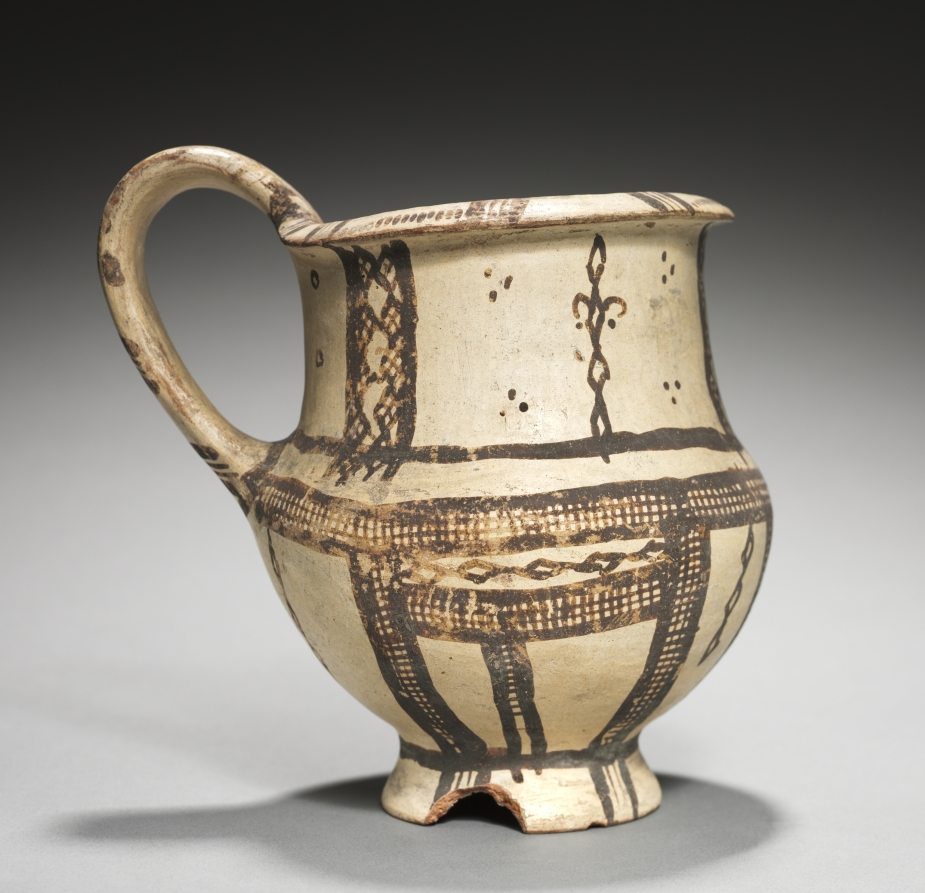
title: Jug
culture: Cyprus, late Cypriot II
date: c. 1450–1200 BCE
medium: white slip ware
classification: Ceramic